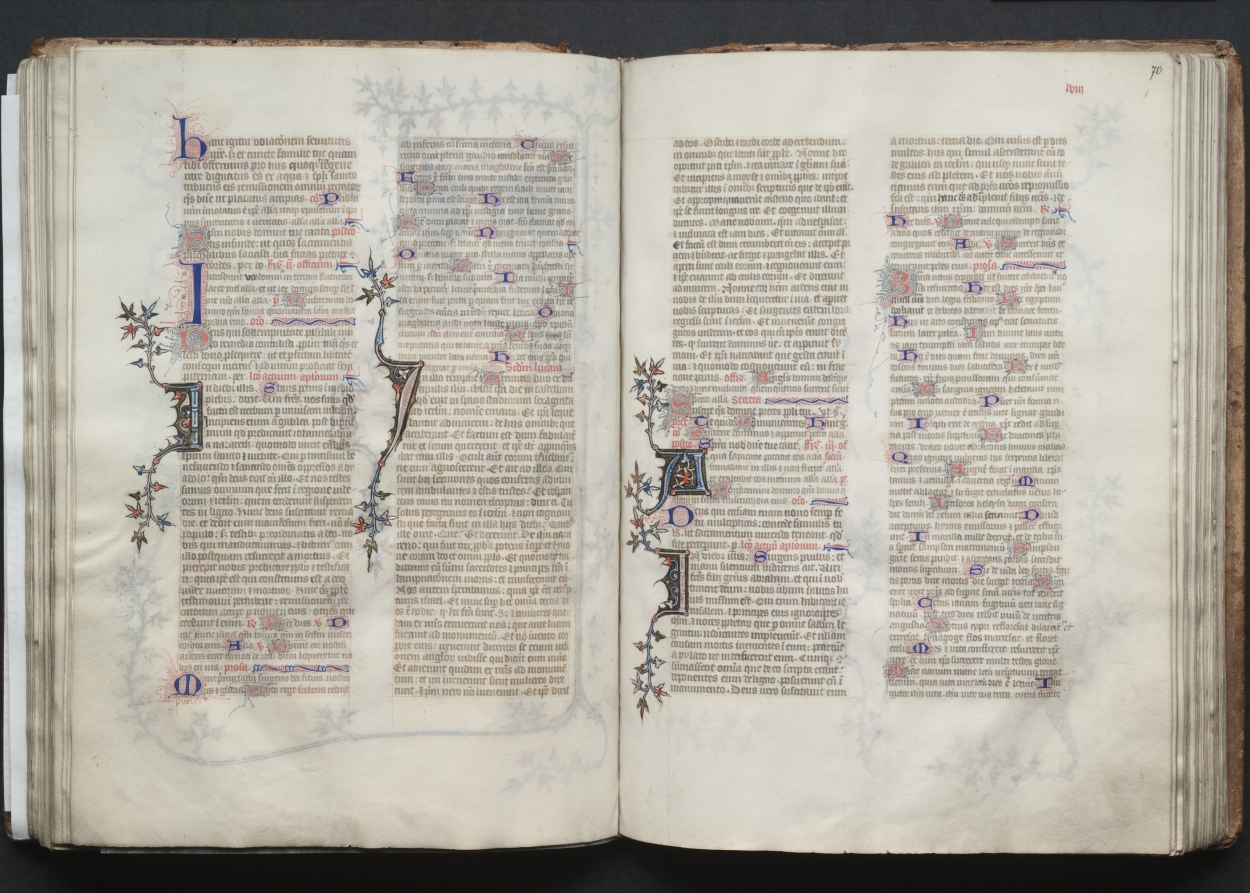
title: The Gotha Missal: Fol. 69v, Text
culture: France, Paris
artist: Master of the Boqueteaux (French)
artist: and Workshop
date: c. 1375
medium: ink, tempera, and gold on vellum; blind-tooled leather binding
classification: Bound Volume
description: The style and quality of this manuscript's decoration is typical of deluxe Parisian books made for aristocratic or royal patrons. Most of the book's decoration appears to be the work of the Master of the Boqueteaux, an artist active at the court of King Charles V (died 1380). His style was apparently shared by a number of book illuminators working in and around Paris. It is very possible that the Gotha Missal belonged to Charles V, but is not provable because the manuscript has no royal portraits and lacks a colophon. Given the book's magnificent decoration, however, it would seem that it was produced for a Valois prince, if not for the king himself. The manuscript receives its name from the German dukes of Gotha, its later owners.